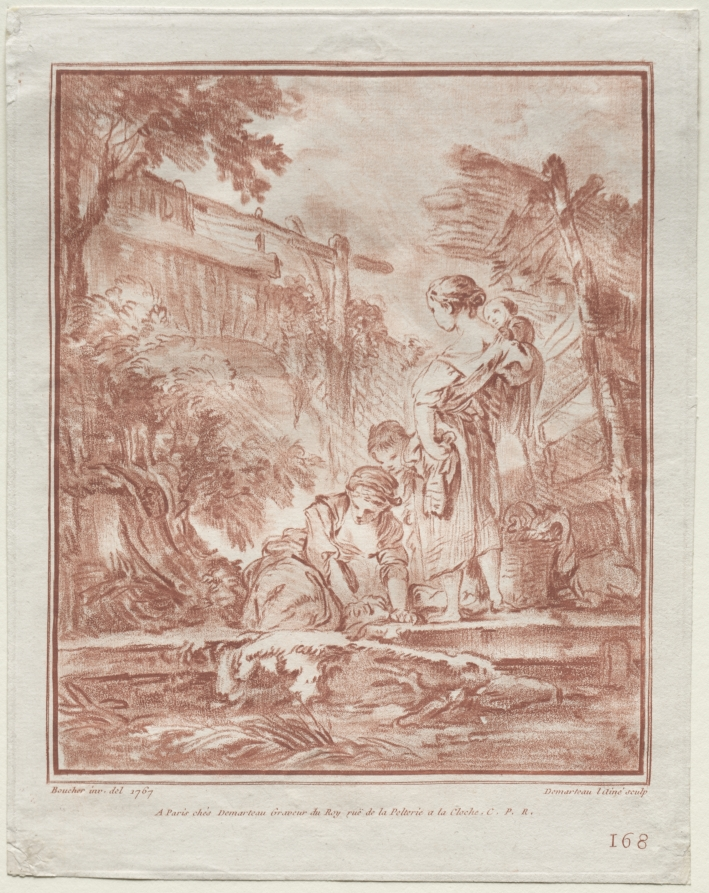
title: The Washerwoman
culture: France, 18th century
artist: Gilles Demarteau (French, 1722–1776)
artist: after François Boucher (French, 1703–1770)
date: 1767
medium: crayon manner etching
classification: Print